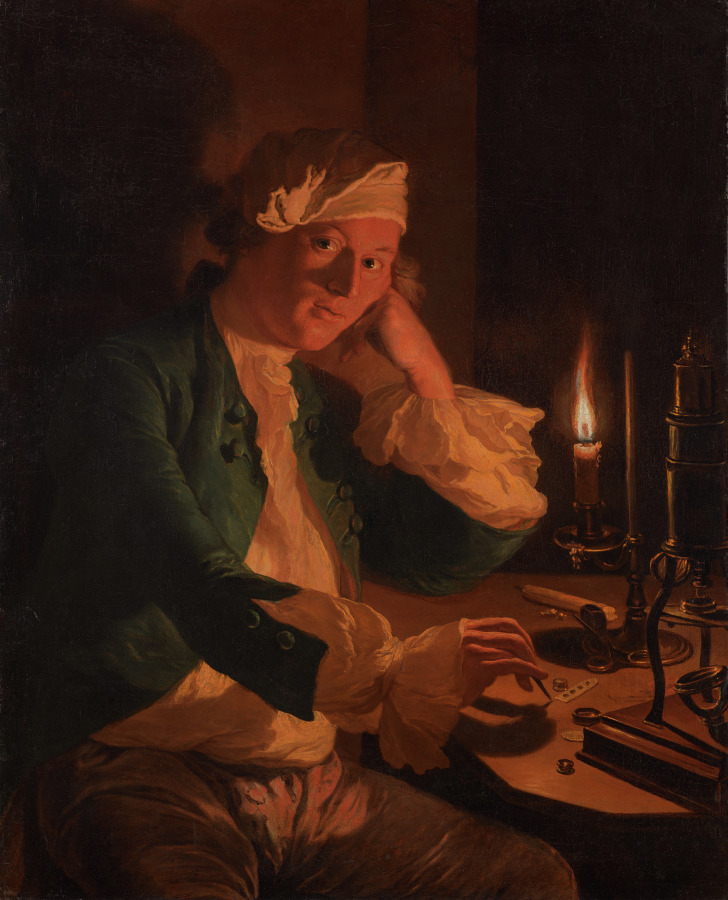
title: A Scientist Seated at a Desk by Candlelight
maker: Anna Dorothea Therbusch (German, 1721/22–1782)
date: 1755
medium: oil on canvas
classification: Painting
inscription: Peint par Anna Dorothea Therbusch Lisiewski 1755.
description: Candlelight subjects were unfashionable in Paris where Anna Dorothea Therbusch nonetheless submitted one for candidacy to the Royal Academy of Fine Arts. She was denied one of three positions allotted to women artists on the grounds that a woman could not have painted such an accomplished work. Therbusch agreed to be observed painting by the male committee and was admitted to membership on her second attempt.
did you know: Therbusch’s painting career began when she was in her 40s, after her children had grown.